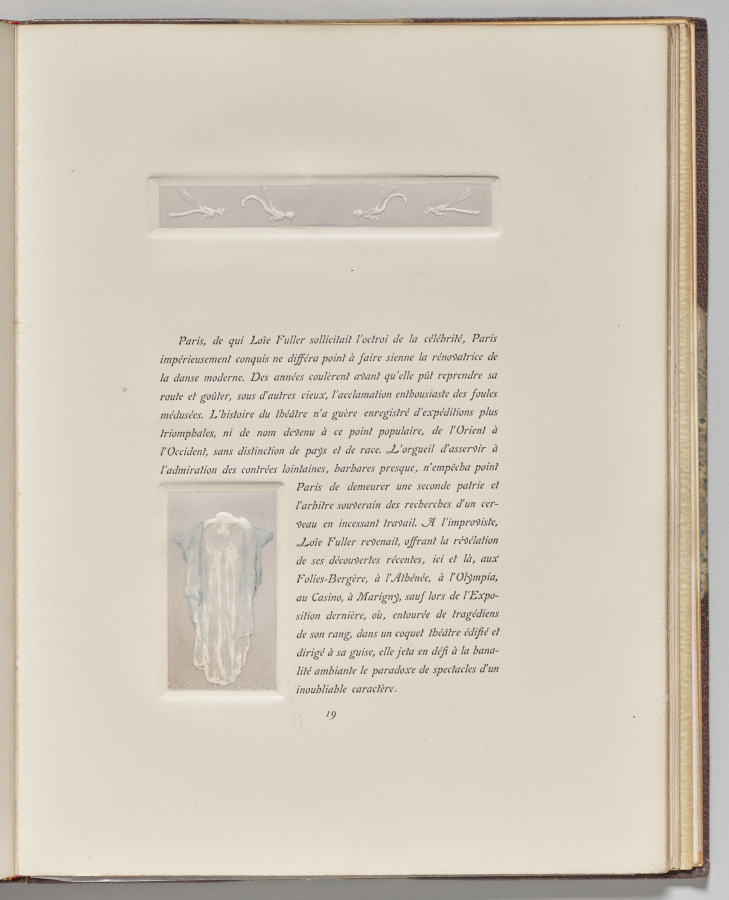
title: Decorative Motif and Standing Woman with Hands on her Head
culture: France, early 20th Century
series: La Loïe Fuller, by Roger Marx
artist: Pierre Roche (French, 1855–1922)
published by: Les Cents Bibliophiles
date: 1904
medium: gypsograph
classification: Bound Volume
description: Although best known as a sculptor, Roche was a versatile and prolific artist who worked in many mediums. Loïe Fuller, the pioneer of modern dance who took Paris by storm in 1892, was one of his favorite subjects. He portrayed her in clay, bronze, marble, plaster, and in a series of gypsographs that illustrated an essay by the art critic Roger Marx. The book was described as "a precious monument to Loïe Fuller."